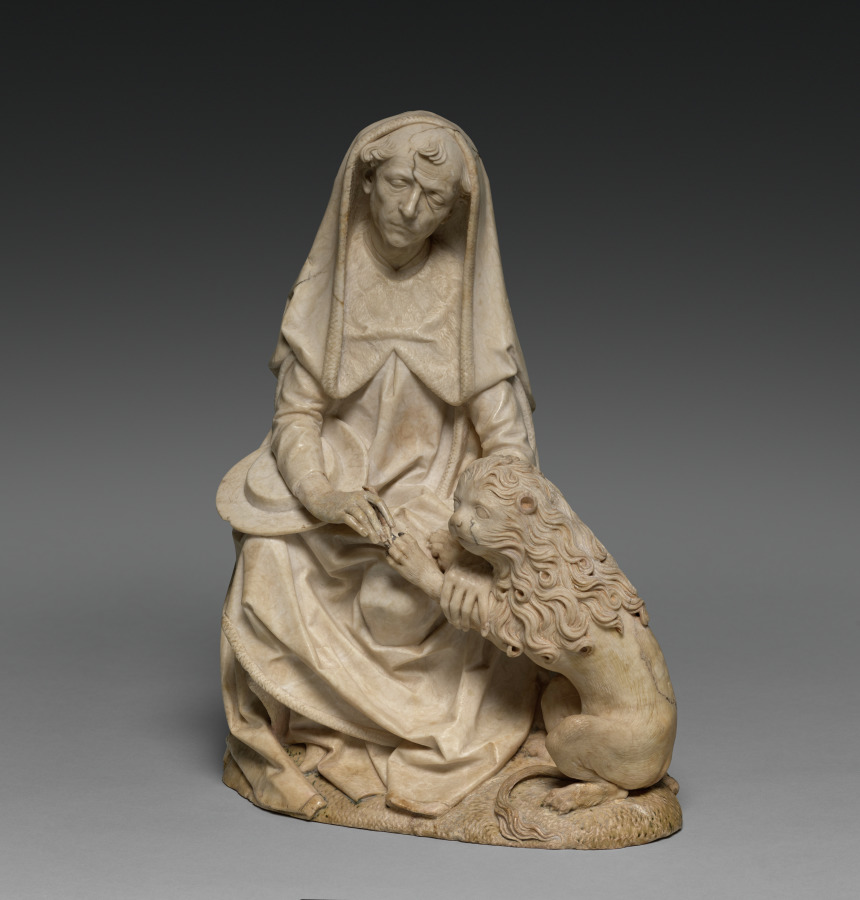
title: Saint Jerome and the Lion (From the former Church of St. Peter in Erfurt)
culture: Germany, Würzburg, late 15th Century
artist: Tilman Riemenschneider (German, active Würzburg, c. 1460–1531)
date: c. 1495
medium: alabaster, traces of polychromy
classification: Sculpture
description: According to legend, Saint Jerome (347–420 bce) lived in the desert, where he removed a thorn from an injured lion. Jerome is venerated in the Catholic Church as a Church Father, an important early author of Christianity. Here, he wears cardinal’s clothing from around 1500. Tilman Riemenschneider focused on Jerome’s relationship with the lion, creating empathy for the wounded animal. The delicacy of the depiction, which may have been partially painted to add highlights, is typical of alabaster, as is its fine polishing. The cord of the cardinal’s hat, missing today, may have been supplemented from another material.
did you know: In the story Saint Jerome encounters a fearsome lion, here depicted as diminutive, gentle, and submissive.